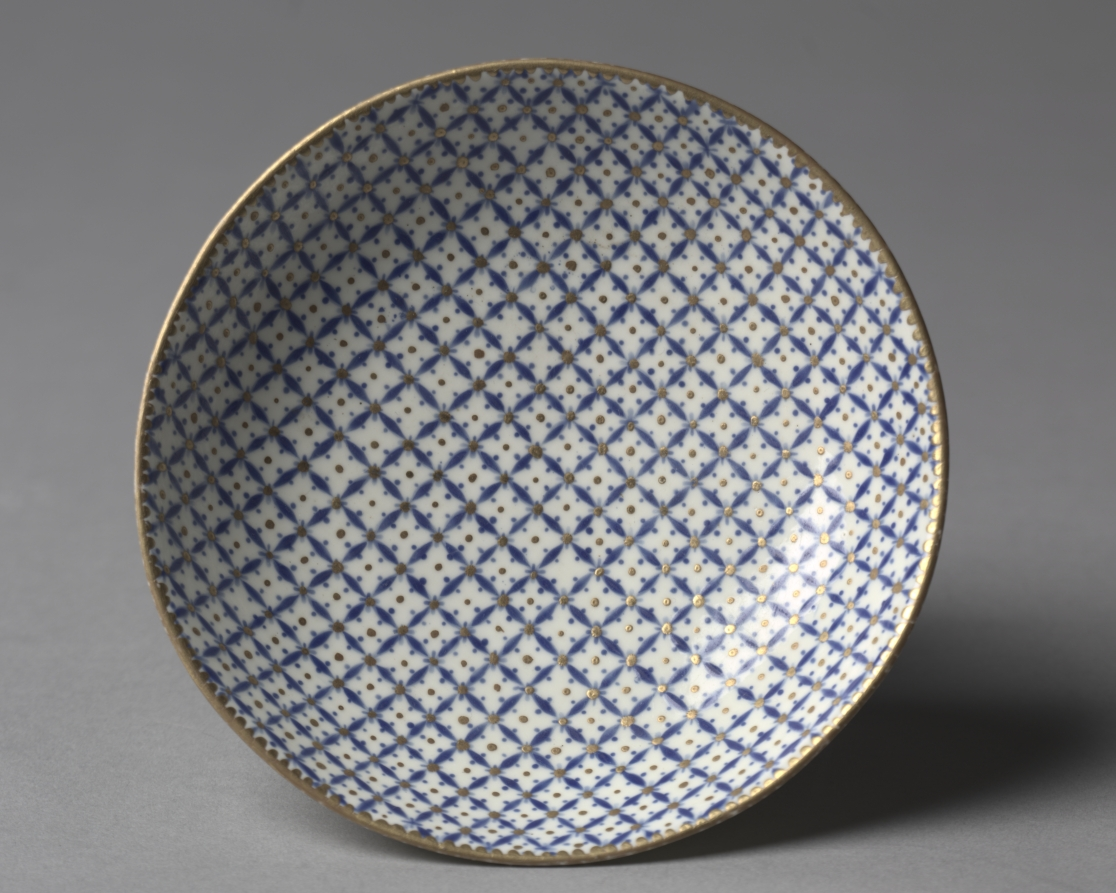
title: Saucer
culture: France, Chantilly, 18th century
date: c. 1760–1770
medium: porcelain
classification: Ceramic